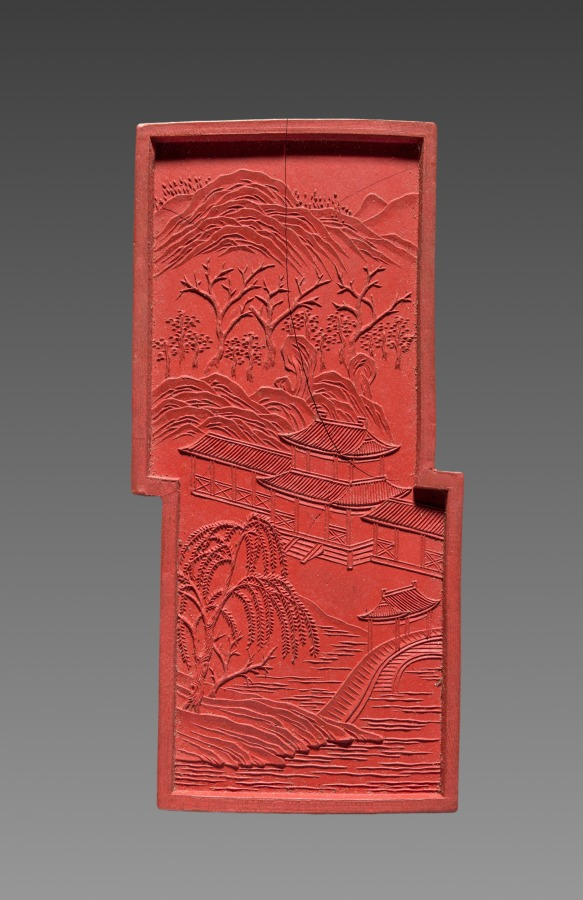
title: Ink Stick from an Imperially Commissioned Set of Ink Stick with Images and Poems of Famous West Lake Sites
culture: China, Qing dynasty (1644–1911), Qianlong reign (1736–95)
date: 1780–94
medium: Molded ink in red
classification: Miscellaneous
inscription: 乾隆年製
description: This is one of ten ink cakes of different shapes and colors stored in an exquisite lacquer box. Each is inscribed in gold with a poem by the Qianlong emperor, praising the ten famous sights of the Westlake in Hangzhou, near Shanghai. The Westlake is famous for its natural beauty; it was a favorite imperial destination and remains a tourist attraction today. Ink cakes (also called ink sticks) are dissolved with the addition of water and ground on the surface of a flat stone into liquid ink for painting and calligraphy. The precious ink cakes here, however, have never been used.